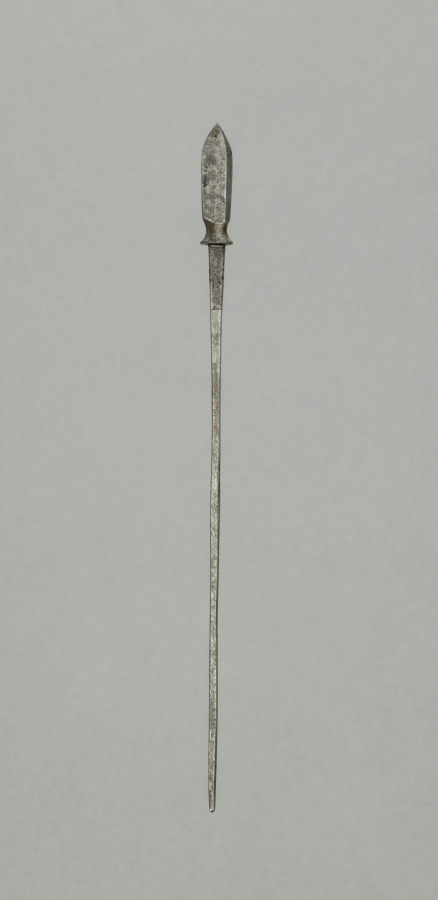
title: Arrow Point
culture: Japan, Edo period (1615–1868)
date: 1700s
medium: steel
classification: Arms and Armor